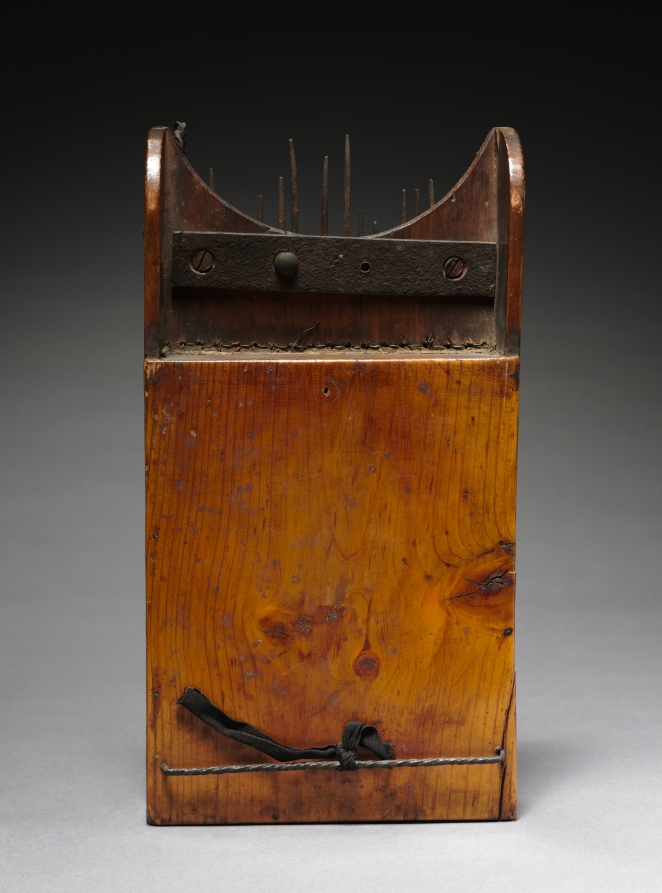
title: Lamellophone "thumb piano"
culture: Africa, Central Africa, Democratic Republic of Congo, Bushoong-style maker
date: 1900s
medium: Wood, iron, and upholstery studs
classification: Musical Instrument